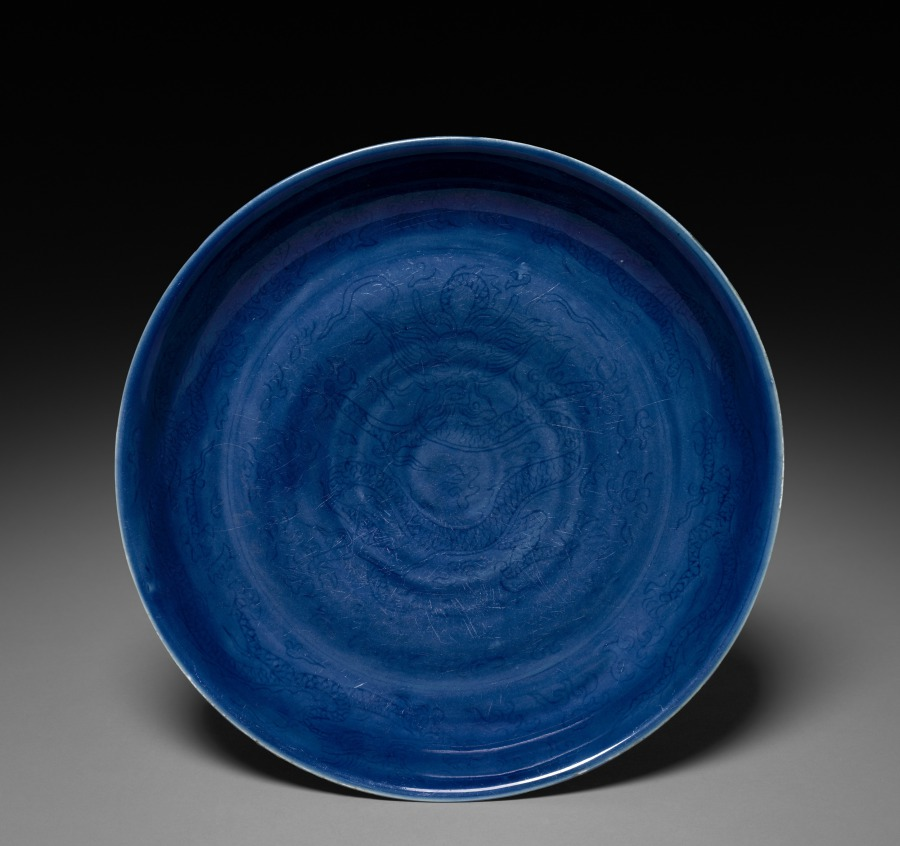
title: Dish with Dragon and Clouds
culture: China, Jiangxi province, Jingdezhen kilns, Ming dynasty (1368-1644), Jiajing mark and reign (1522-66)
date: 1522–66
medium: porcelain with incised and underglaze blue decoration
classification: Ceramic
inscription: 大明嘉靖年製